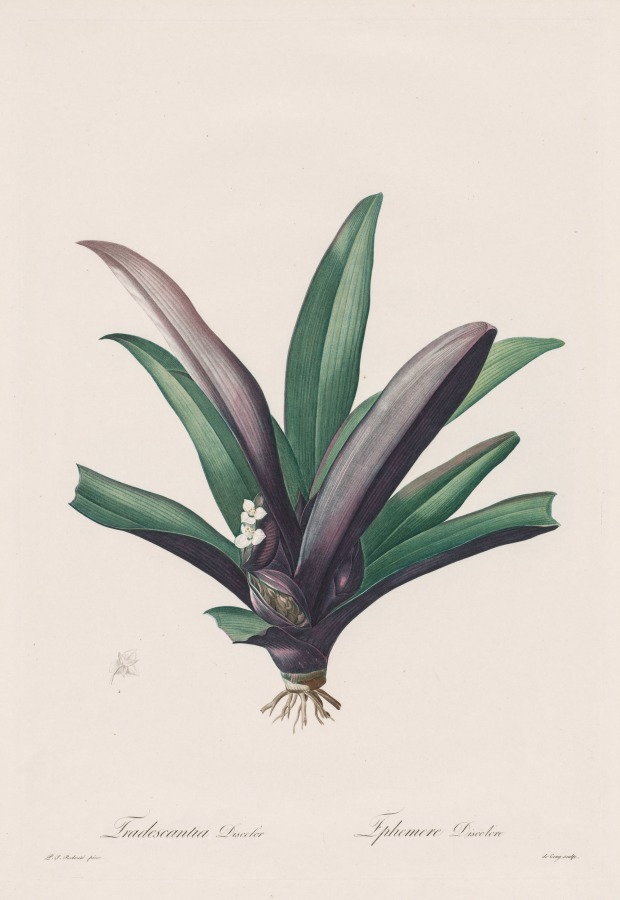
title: Les Liliacées: Tradescantia discolor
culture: France, 19th century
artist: Henri Joseph Redouté (French, 1766–1853)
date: 1802–1816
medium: stipple and line engraving, with hand coloring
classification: Print